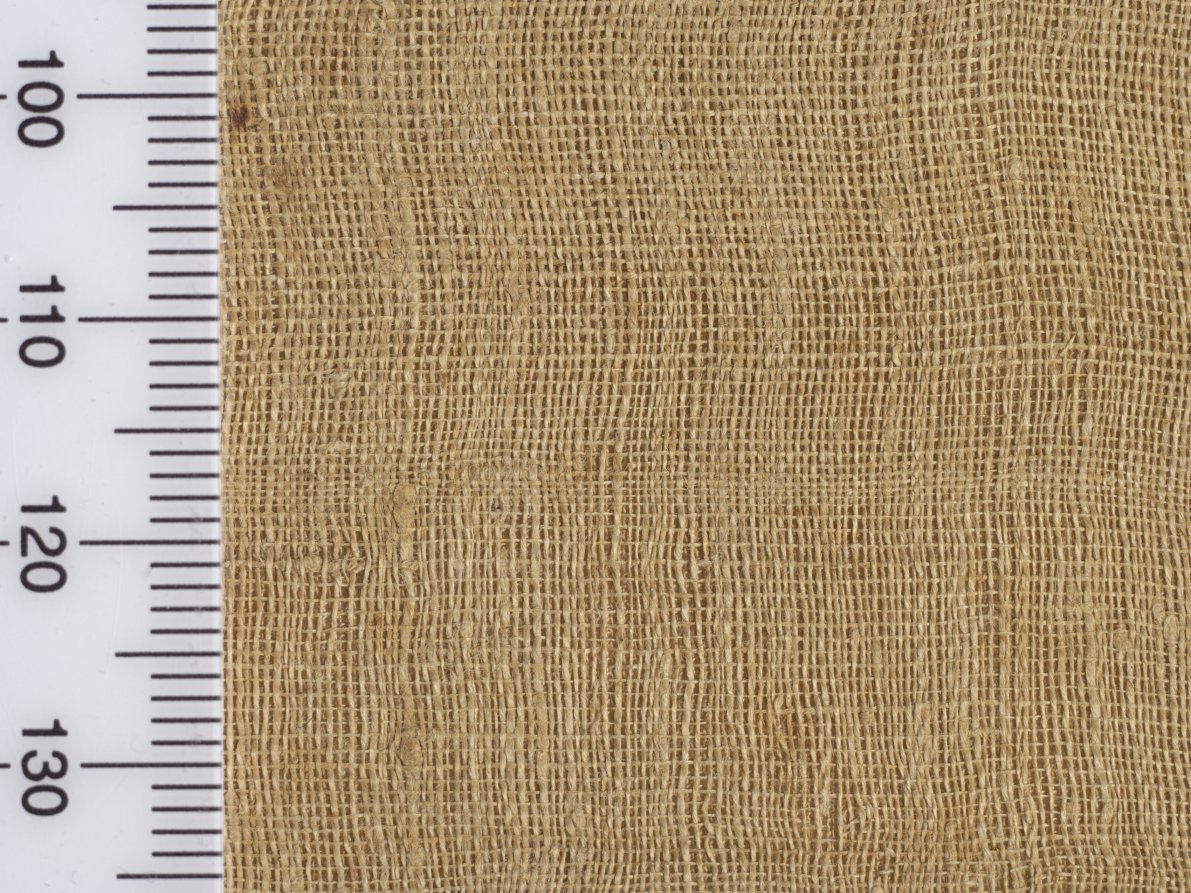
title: Tiraz with gold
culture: Egypt, Fatimid period, reign of Caliph al-Musta‘lī, 1094–1101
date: 1094 – 1101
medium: plain weave with inwoven tapestry weave: linen, silk, and gold filé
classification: Textile